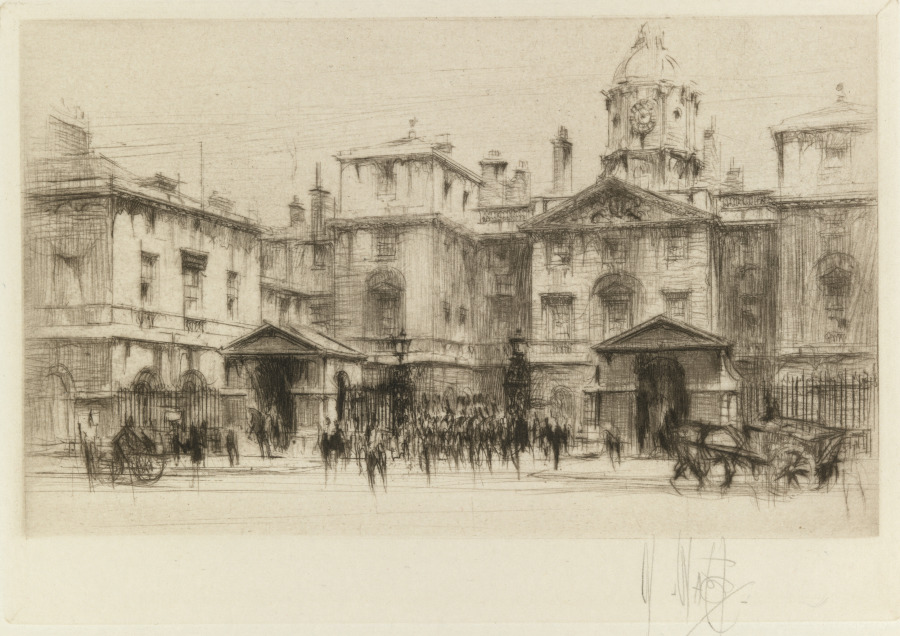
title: London Set: Horseguards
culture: Britain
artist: William Walcot (British, 1874–1943)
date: 1924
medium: etching and drypoint on wove paper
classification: Print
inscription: signed